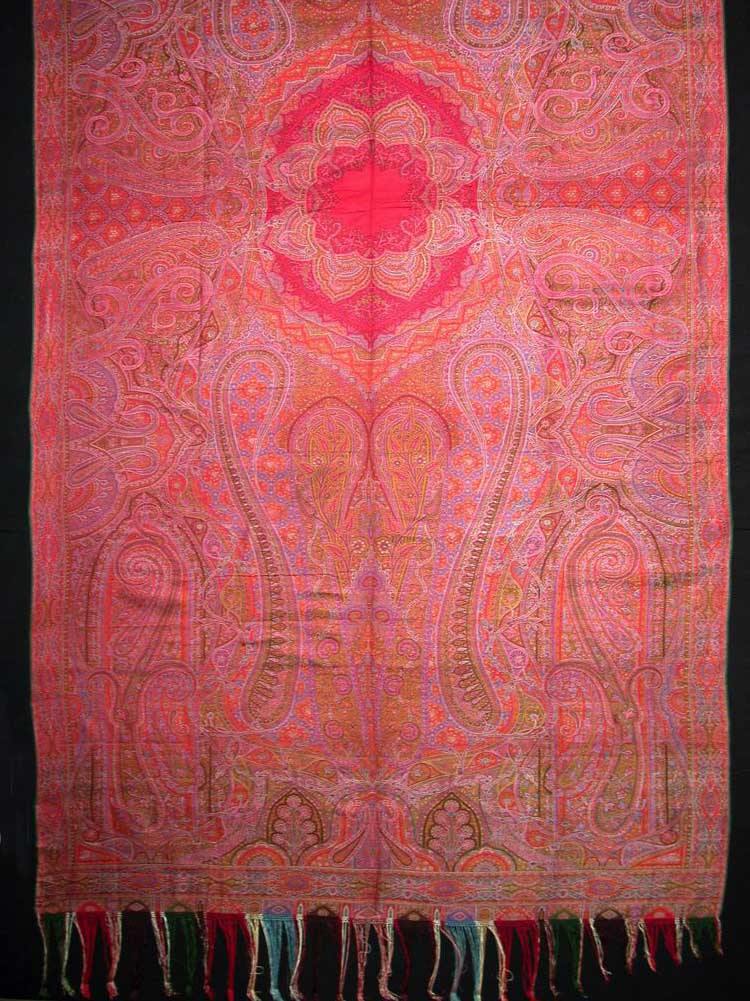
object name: Costume and Accessories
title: Shawl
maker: Produced by Clabburn, Sons and Crisp; England, Norwich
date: 1860s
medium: Silk, twill weave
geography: Norwich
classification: weaving; costume